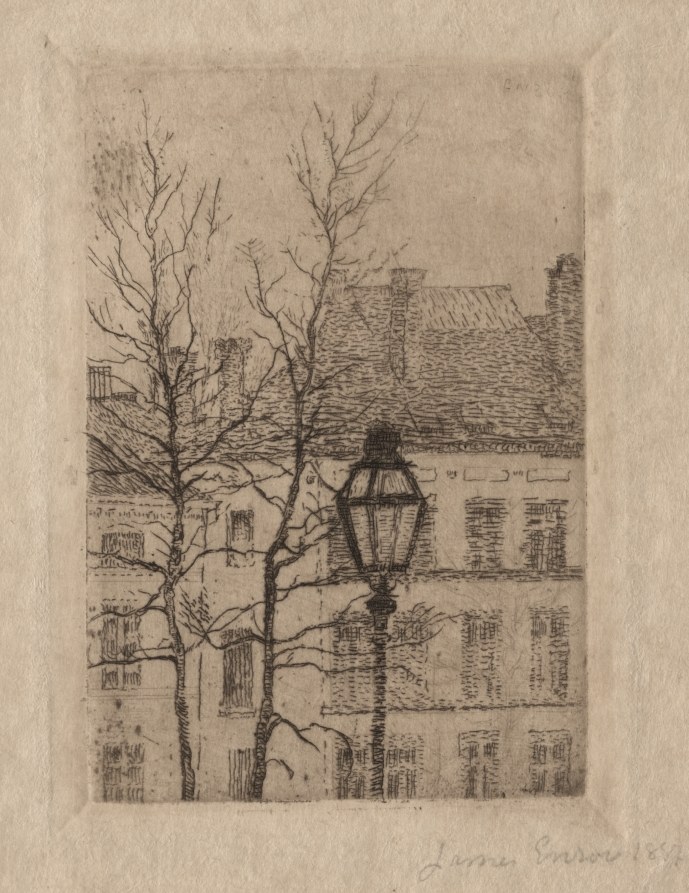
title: The Street Lamp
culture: Belgium, 19th century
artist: James Ensor (Belgian, 1860–1949)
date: 1887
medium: etching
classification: Print